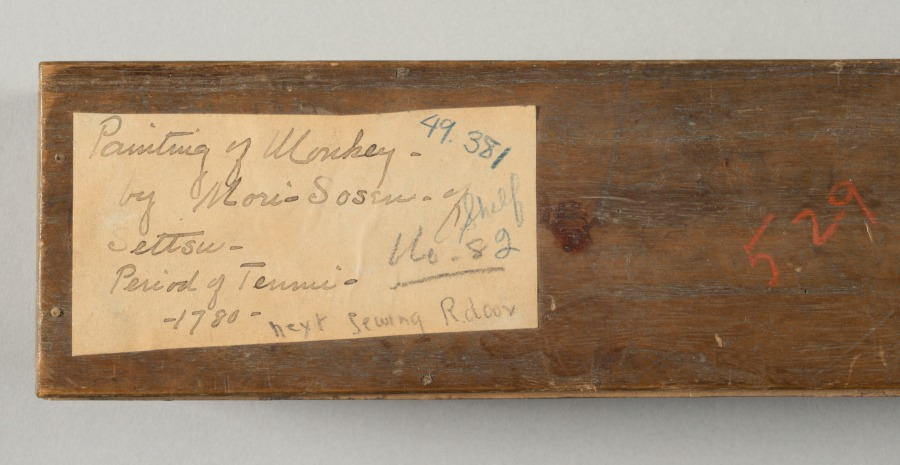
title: Monkey Hanging on to a Branch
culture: Japan, Edo period (1615–1868)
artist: Mori Sosen (Japanese, 1747–1821)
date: 1780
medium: hanging scroll; color on paper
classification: Painting